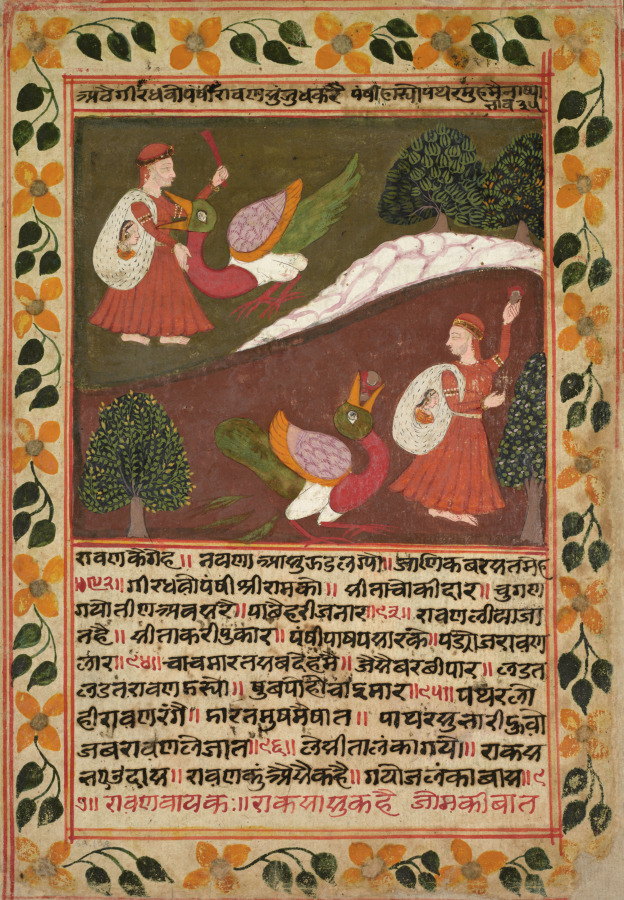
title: Ravana battles the great vulture Jatayu and defeats him by throwing stones in his mouth, folio 18 (recto) from a Chandana Malayagiri Varta (Story of King Chandana and Queen Malayagiri) of Karamachand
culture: Northwestern India, Rajasthan, Rajput Kingdom of Kishangarh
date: 1744–45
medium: Gum tempera, ink, and gold on paper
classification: Painting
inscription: [[caption above image]] aṭhai gīradhavo paṁkhī rāvaṇa suṁ judha karai paṁkhī hāryo pathara muha mai nākhyā / bhāva 35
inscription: [[text below image]] rāvaṇa kai geha || nayaṇā āsu jhaḍa lagyau || jāṇika barasata meha / ||92|| gīradhavo paṁkhī śrī rāma ko || sītā cokīdāra || cugaṇa / gayo tīṇa avasarai || pāchai harī ja nāra ||93|| rāvaṇa līyā jā / ta hai || sītā karī pukāra || paṁkhī pākha pasāra ke || paḍyo ja rāvaṇa / lāra ||94|| cāca mārata saba deha mai || jaisai barachī pāra || laḍata / laḍata rāvaṇa ḍaryo || khuba pohocāï māra ||95|| pathara lo / hī rāvaṇa raṁgai || ḍārata mukha mai khāta || pāthara su bhārī huvo / jaba rāvaṇa le jāta ||96|| le sītā laṁkā gaye || rākasa / bhae ūdāsa || rāvaṇa kuṁ aisai kahai || gayo ja laṁkā bāsa ||9 / 7|| rāvaṇa vāyakaḥ || rākasā su kahai joma kī bāta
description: Scenes of the abduction and rescue of Sita are embedded within a popular tale rewritten in a Gujarati-Rajasthani vernacular language by the poet Karamachand in 1629–30. Many details differ from the more well-known Ramayana of Valmiki. The artist shows Ravana as a merchant carrying Sita in a white sack slung over one shoulder. As Jatayu, a vulture ally of Rama, attempts to rescue her, Ravana attacks him with a sword, above. He then defeats the bird by throwing stones in his mouth. He painted the stones with blood, so Jatayu would swallow them.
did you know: The blood-covered stones will weigh the bird down, so he cannot rescue Sita.